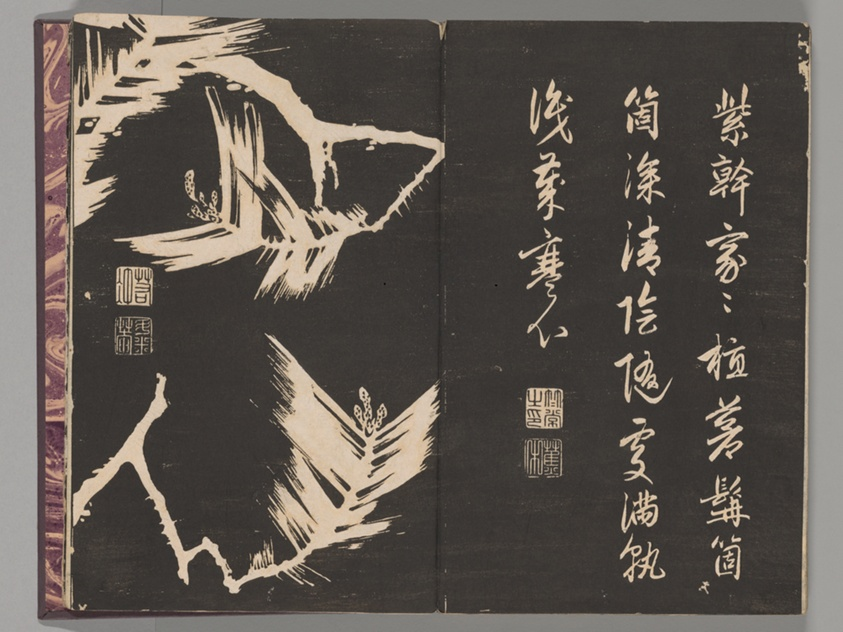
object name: Book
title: Soken sekisatsu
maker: Ito Jakuchu (Japanese, 1716-1800)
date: 1767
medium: Woodblock printed book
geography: Japan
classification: book